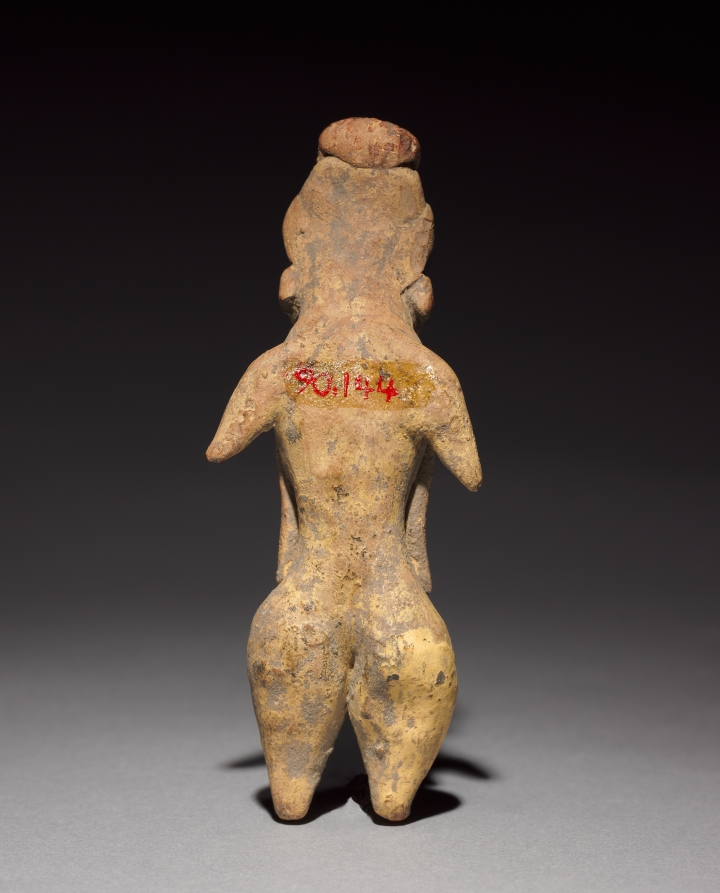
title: Female Figurine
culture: Mesoamerica, Central Mexico, Tlatilco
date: c. 1200–900 BCE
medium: earthenware with pigment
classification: Sculpture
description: This ceramic figurine—in the style of Tlatilco, an early village site near Mexico City—depicts a nude female with an elaborate coiffure, attenuated arms, and the traces of mineral pigment. Since many figurines from the period depict females, modern interpreters usually connect them to fertility concerns. At Tlatilco, figurines were found in human burials that had been placed under the floors of homes.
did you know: Figurines were also made of perishable materials including wood, paper, cloth, rubber, and dough.